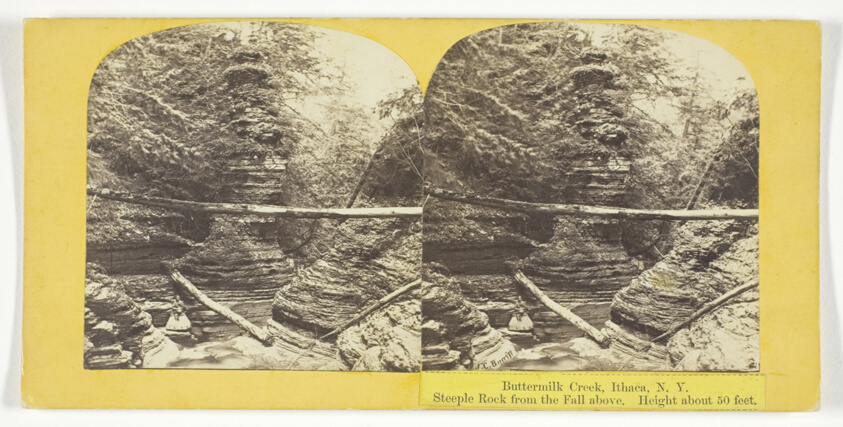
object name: Photograph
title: Buttermilk Creek, Ithaca, N.Y. Steeple Rock from the Fall above. Height about 50 feet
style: 19th century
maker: J. C. Burritt; American, active 1860s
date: 1860/65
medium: Albumen print, stereo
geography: Ithaca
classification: photography; photograph; albumen silver print; stereograph (albumen)